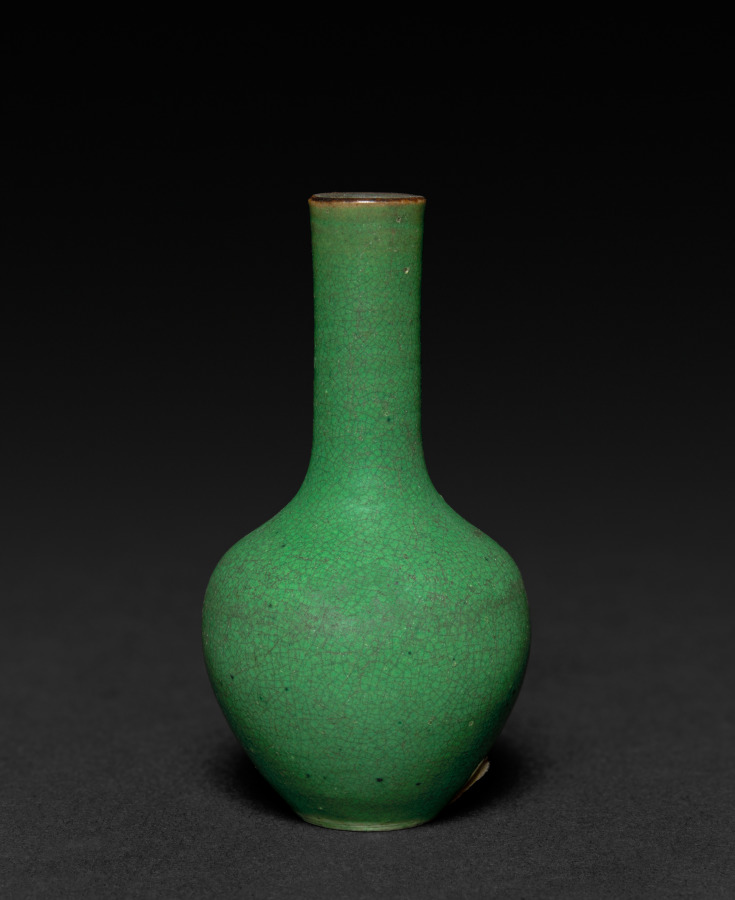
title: Vase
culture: China, Qing dynasty (1644-1911)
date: 1644–1911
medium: porcelain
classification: Ceramic